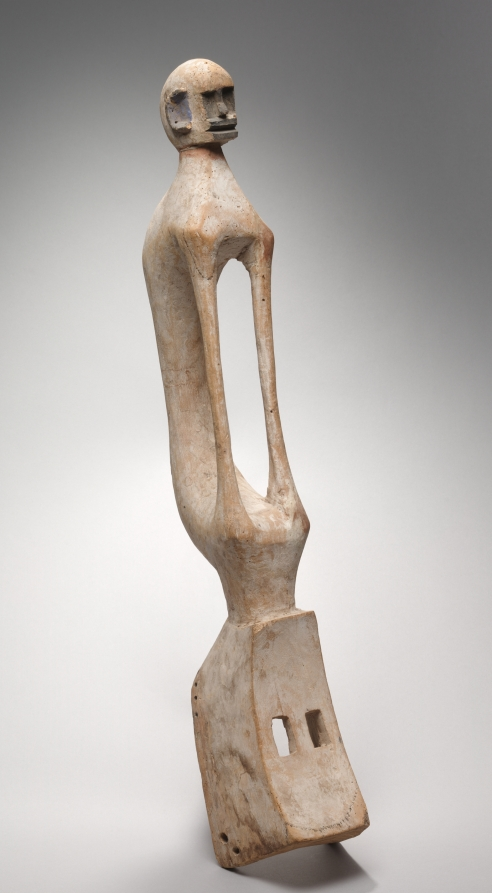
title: Mask (Omono or Tana Wurum Bogoro)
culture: Africa, West Africa, Mali, Dogon-style blacksmith-carver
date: early 1900s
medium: Wood and paint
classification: Mask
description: Dogon masks can be interpreted on two fundamentally different levels: “front speech” (giri so) reflects an early stage of knowledge and consists of a tale that is intended to arouse curiosity; and “speech of the world” (aduno so) refers to Dogon cosmogony, reserved for highly instructed men and women. Masked dances have recently been organized in Dogon regions for tourists and dignitaries. The character of omono is a rare one among the 80 or so that appear in Dogon masquerades.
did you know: The long-armed figure at the top of this mask is omono, a white-bellied monkey.